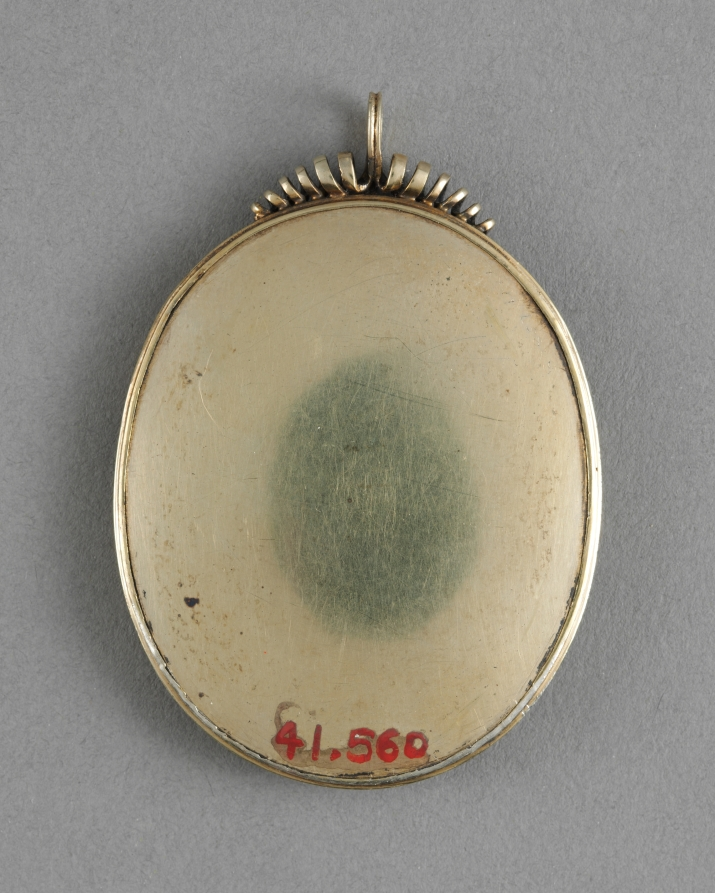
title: Portrait of a Man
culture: England, late 16th-early 17th century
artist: circle of Isaac Oliver (French, c. 1565–1617)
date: c. 1615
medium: watercolor on card in a later silver gilt frame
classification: Portrait Miniature